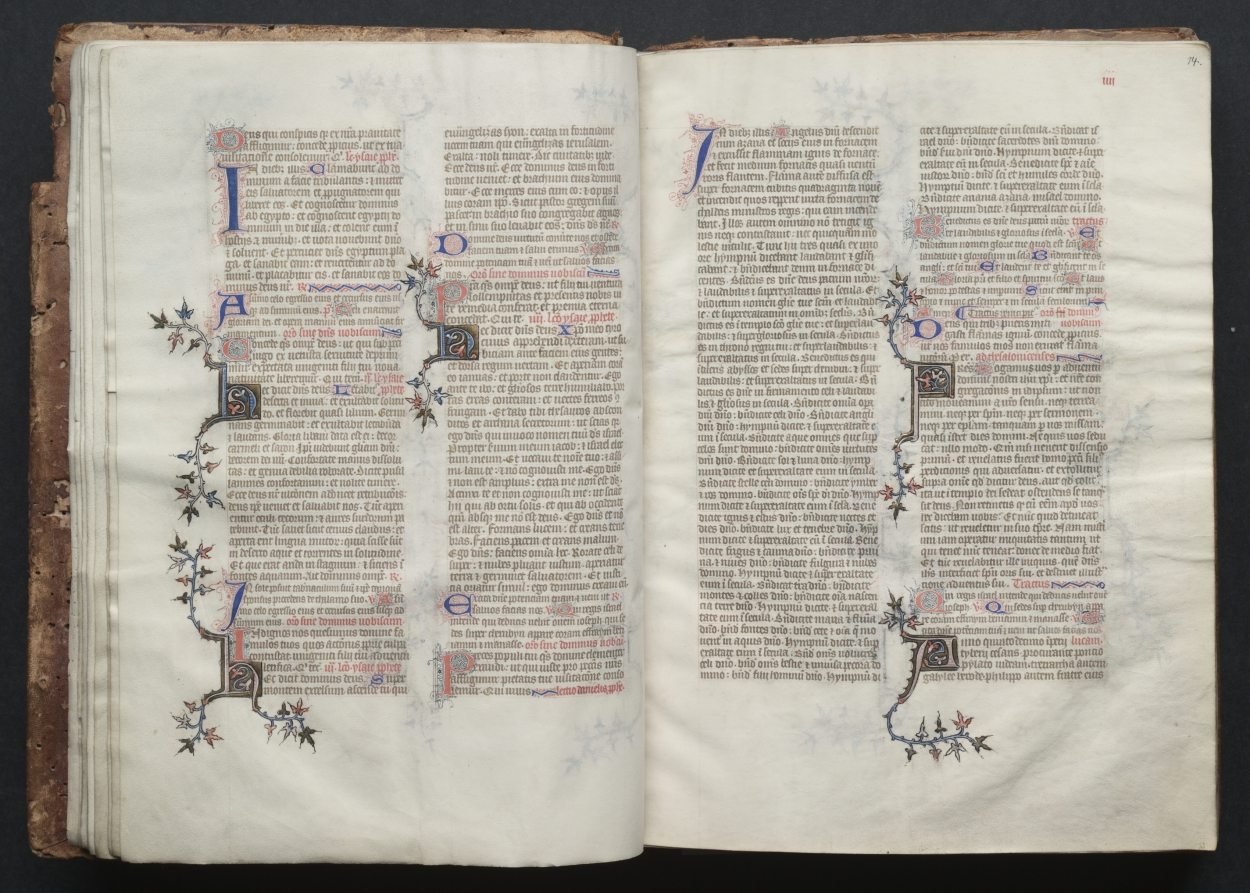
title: The Gotha Missal: Fol. 13v, Text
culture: France, Paris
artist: Master of the Boqueteaux (French)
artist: and Workshop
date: c. 1375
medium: ink, tempera, and gold on vellum; blind-tooled leather binding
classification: Bound Volume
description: The style and quality of this manuscript's decoration is typical of deluxe Parisian books made for aristocratic or royal patrons. Most of the book's decoration appears to be the work of the Master of the Boqueteaux, an artist active at the court of King Charles V (died 1380). His style was apparently shared by a number of book illuminators working in and around Paris. It is very possible that the Gotha Missal belonged to Charles V, but is not provable because the manuscript has no royal portraits and lacks a colophon. Given the book's magnificent decoration, however, it would seem that it was produced for a Valois prince, if not for the king himself. The manuscript receives its name from the German dukes of Gotha, its later owners.